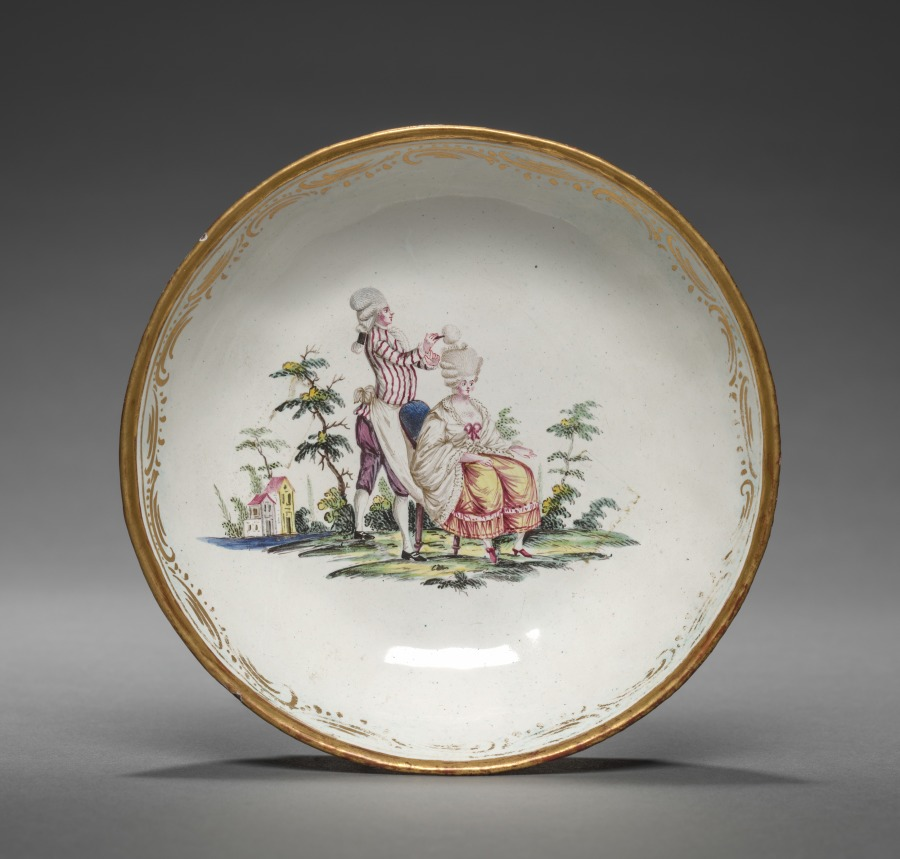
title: Cup and Saucer: Saucer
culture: England, mid-18th Century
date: mid-18th century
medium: enamel on metal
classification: Enamel